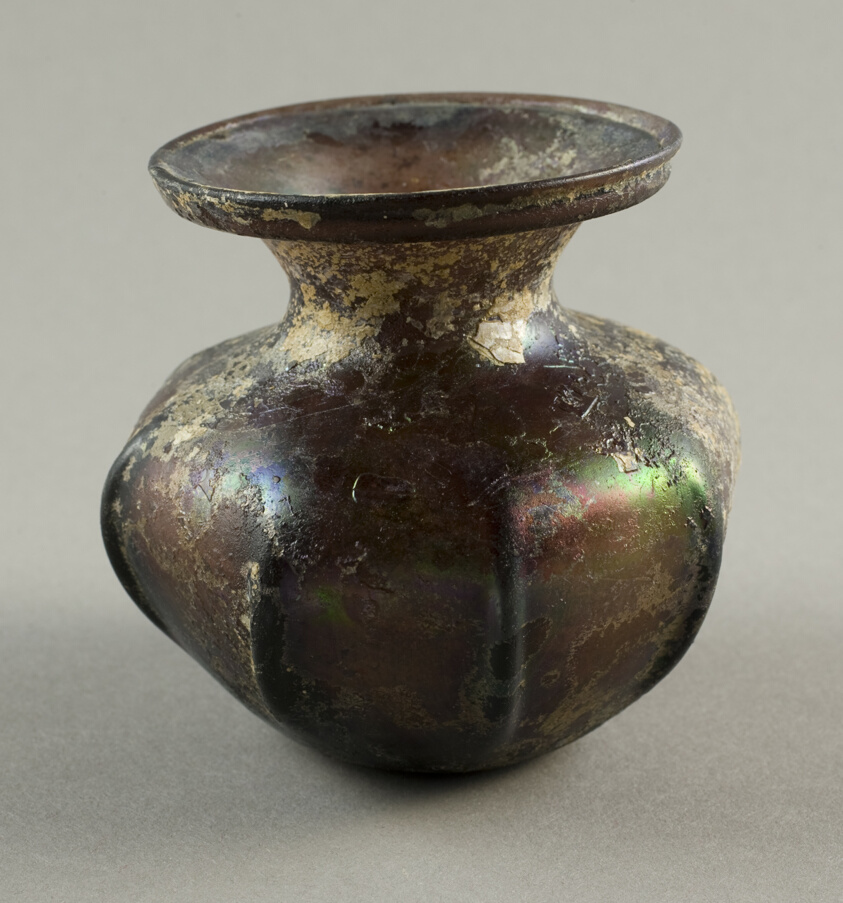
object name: Vessel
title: Jar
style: syrian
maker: Roman; Syria or Ancient Mediterranean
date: 2nd-3rd century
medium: Glass, blown technique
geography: Syria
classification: vessel; glass; ancient art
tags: vessels